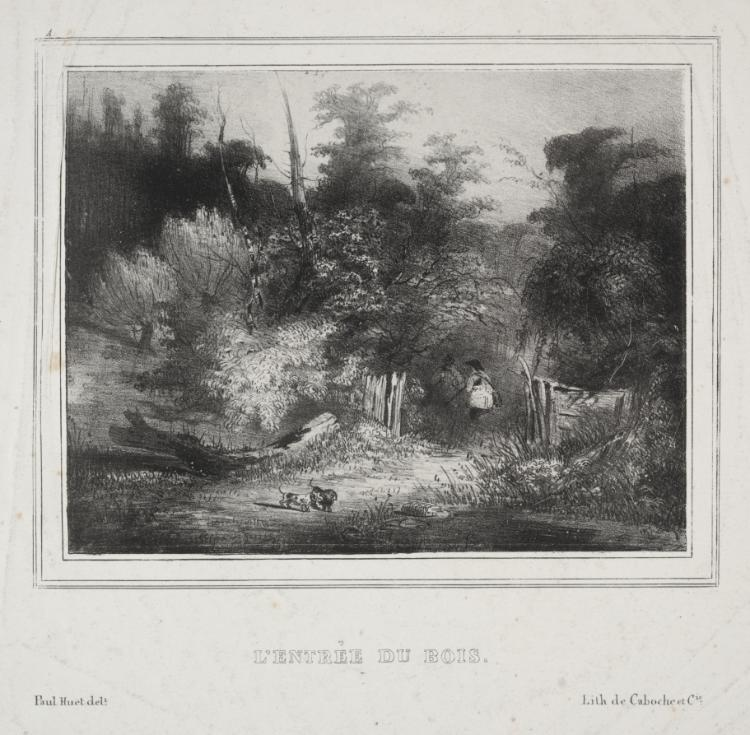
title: Landscapes: The Entrance of a Forest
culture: France, 19th century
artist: Paul Hüet (French, 1803–1869)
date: 1829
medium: lithograph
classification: Print